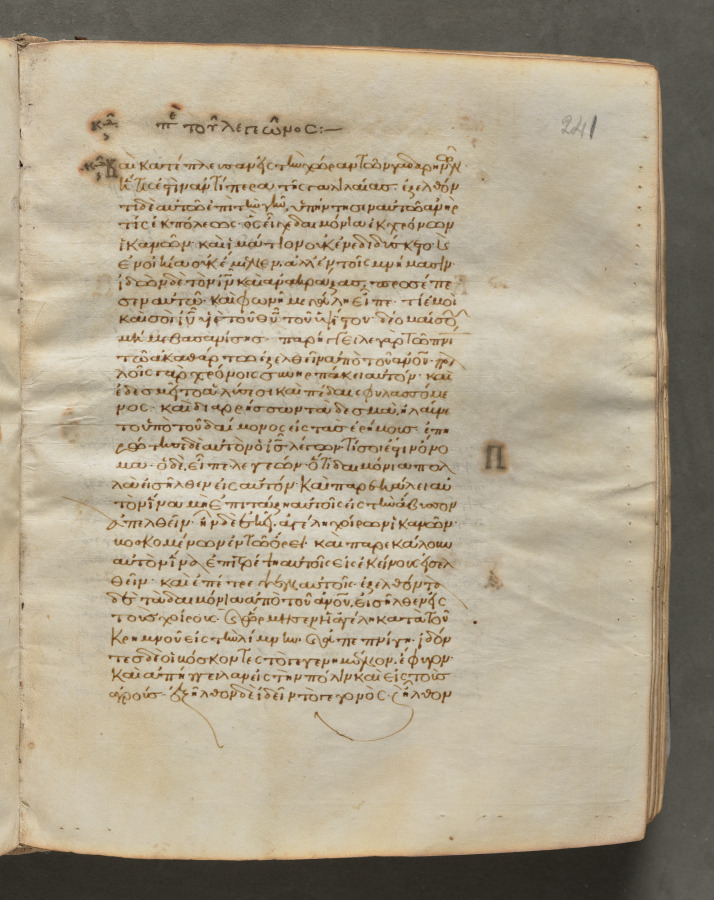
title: Text, folio 241 (recto), from a Gospel Book with Commentaries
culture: Byzantium, Constantinople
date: c. 1000–1100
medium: ink, tempera, and gold on vellum; leather binding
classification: Bound Volume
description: Each of the four gospels in this book opens on a page with brilliantly illuminated borders depicting the author of the text as well as birds—principally peacocks, symbols of the immortality of the soul—and fountains, representing the fountain of life and the salvation of the soul. This volume consists of 428 leaves with texts in Greek. Its level of sophistication suggests that it was probably written and decorated in a monastery in Constantinople.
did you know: Gospel books were carried in procession through Byzantine churches.